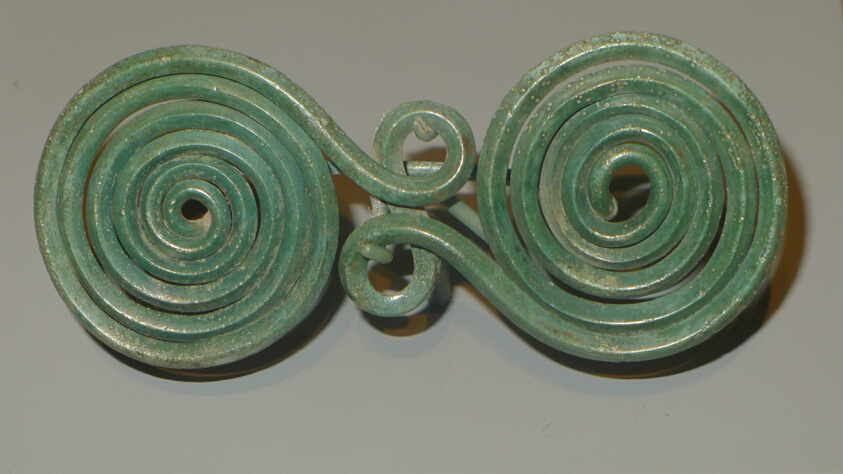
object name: Costume and Accessories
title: Fibula (Garment Pin)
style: geometric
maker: Greek; probably from Southern Italy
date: Geometric Period (about 800 BCE)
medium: Bronze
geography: Southern Italy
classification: fibula; bronze; metal; jewelry; ancient art; costume